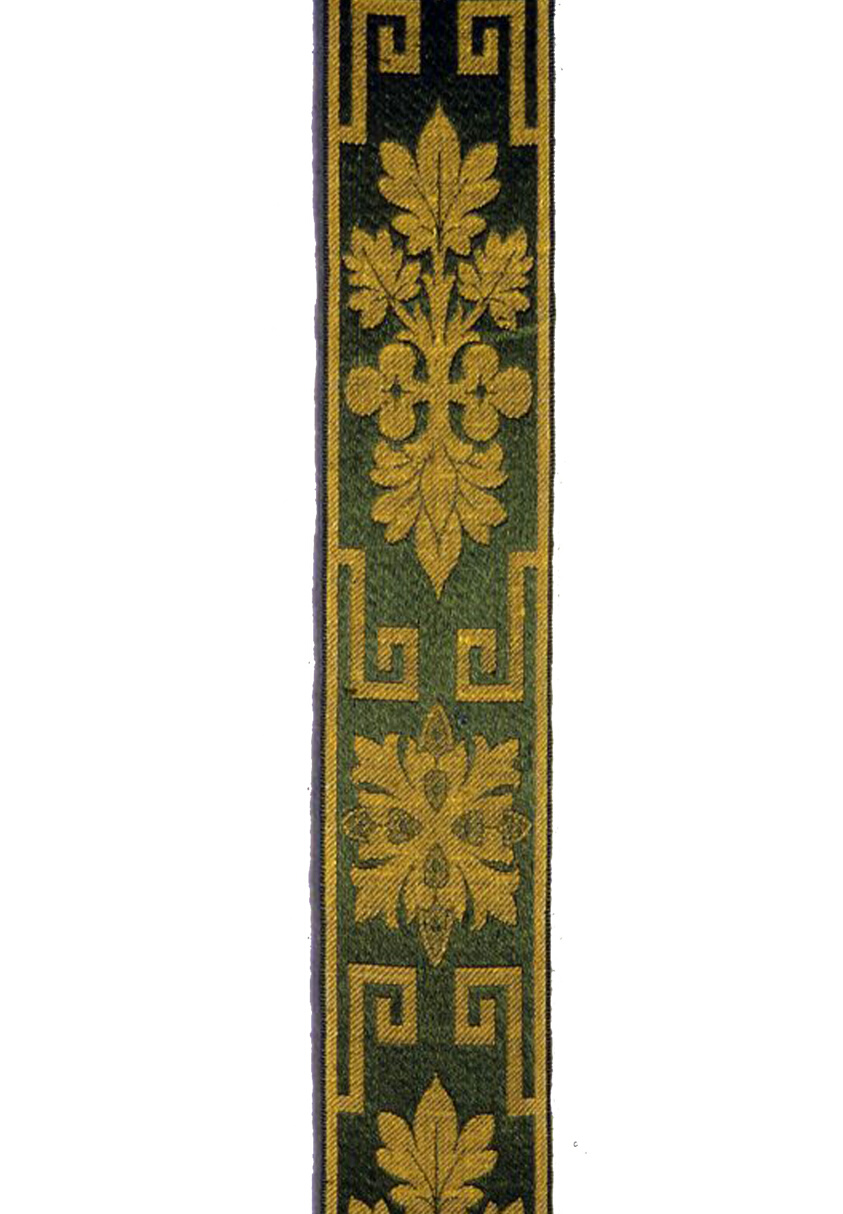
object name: Textile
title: Border or Ribbon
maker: France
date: 1860s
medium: Silk and cotton, warp-float faced satin weave with supplementary patterning wefts tied by supplementary binding warps in a twill interlacing (lampas)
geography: France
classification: textile; weaving